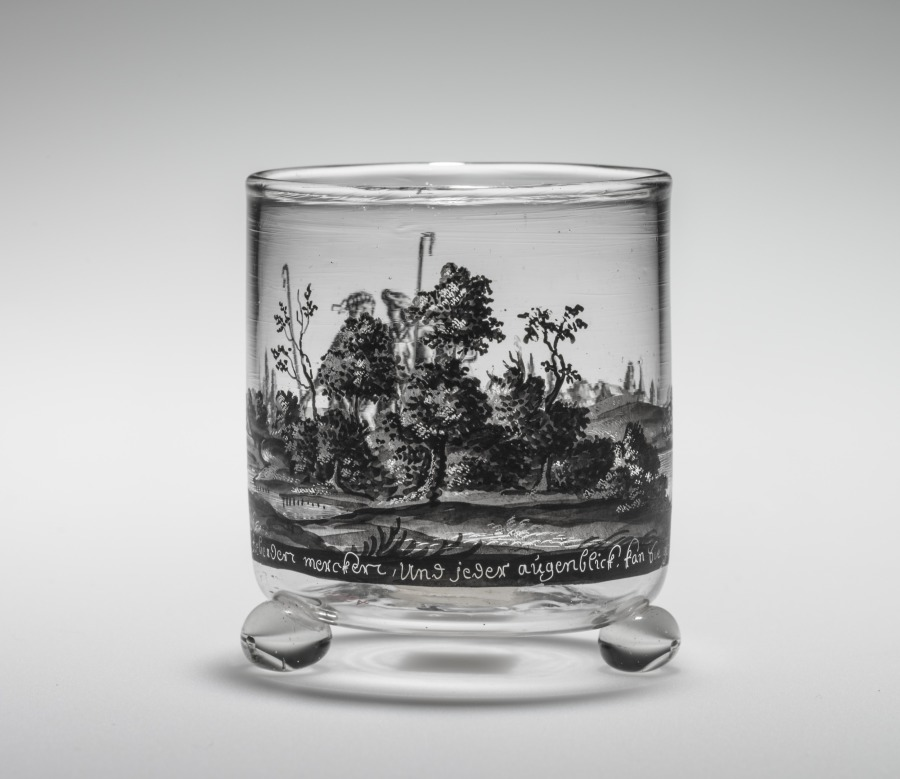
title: Tumbler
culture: Germany, Nuremberg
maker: attributed to Johann Schaper (German, 1635–1670)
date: 1670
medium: glass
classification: Glass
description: Johann Schaper (1621-1670) was a German painter of stained glass, mainly working in Nuremberg and Regensberg, who later turned to decorating glass and ceramics from his home, typical of artisans in the 17th century (hausmaler). His style was mainly a linear one in the manner of engravings, and often he worked in black (schwarzlot) or dark colors. Schaper was so influential that other artisans tried to copy his technique, in which he scratched out details with a needle, with varying degrees of success.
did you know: The fine details of the decoration on this tumbler were achieved by scratching away the enamel with a needle.